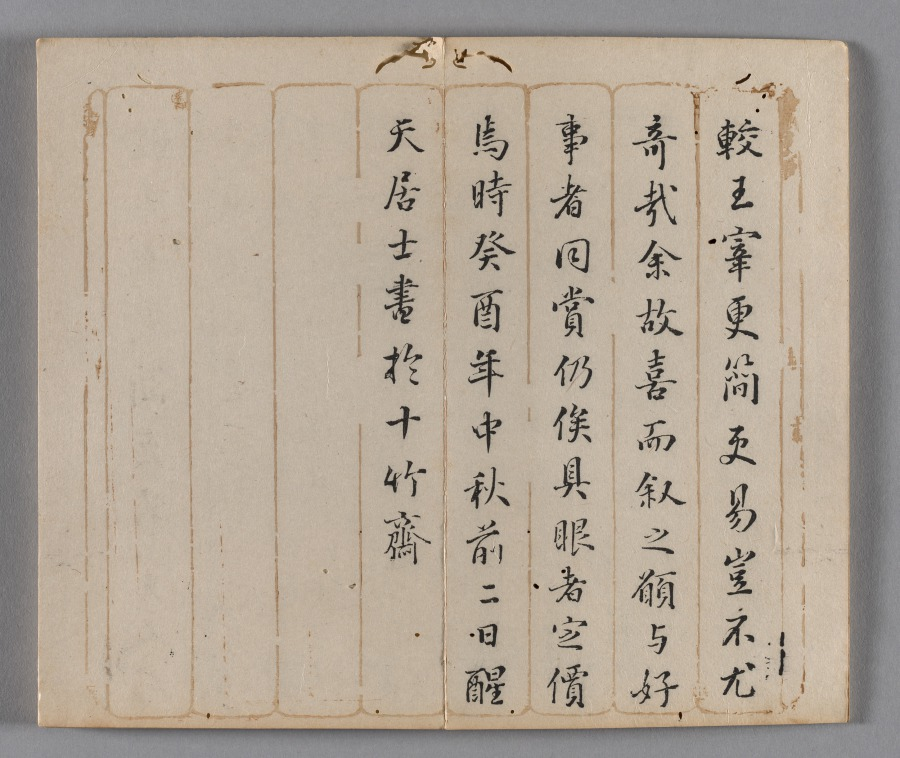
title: Ten Bamboo Studio Painting and Calligraphy Handbook (Shizhuzhai shuhua pu): Fruit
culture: China, Qing dynasty (1644-1911)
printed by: Hu Zhengyan (Chinese, c. 1584–1674)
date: 1633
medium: Woodblock-printed book; ink and colors on paper; first edition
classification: Print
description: Color printing reached a level of perfection in the early 1600s, as seen in this Ten Bamboo Studio Collection of Calligraphy and Painting and the Mustard Seed Garden Manual of Painting (printed 1679 and 1701). The painterly quality, precision in registering (aligning) the woodblocks, and harmonious colors made them the most successful color print editions in Chinese history. Both editions were printed and compiled in Nanjing, spread nationwide, and had a great impact on the arts in Japan and Korea.